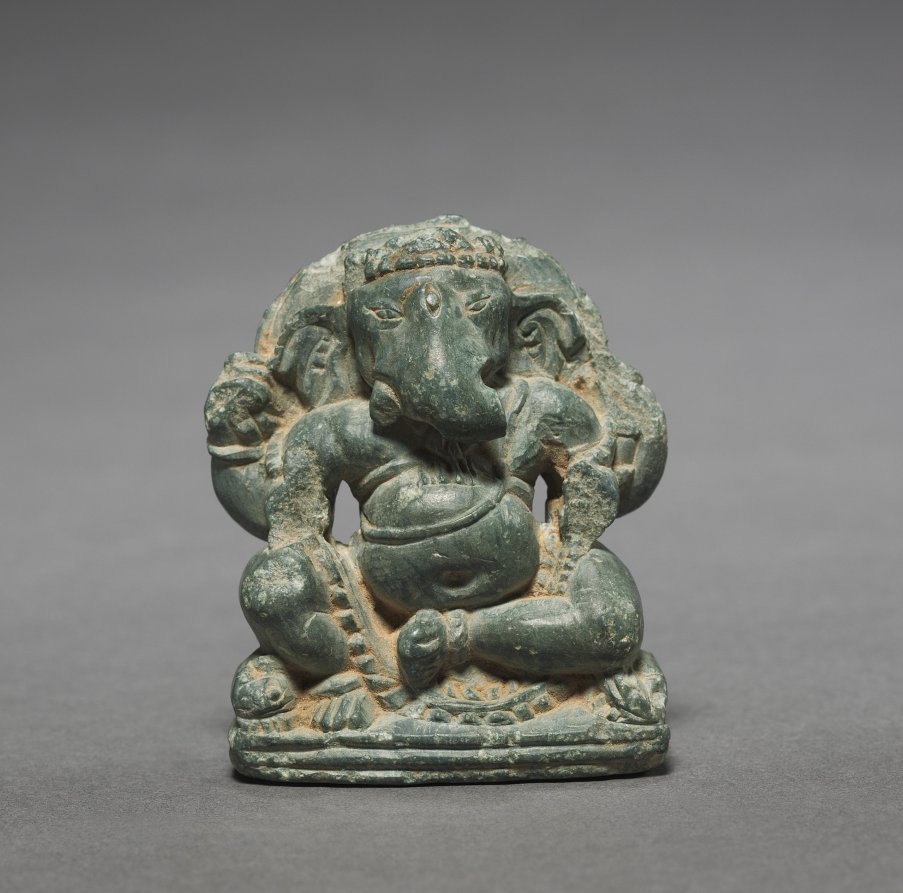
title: Miniature Seated Ganesa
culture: Northwest India or Kashmir, c. 8th Century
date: c. 700s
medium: greenish schist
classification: Sculpture